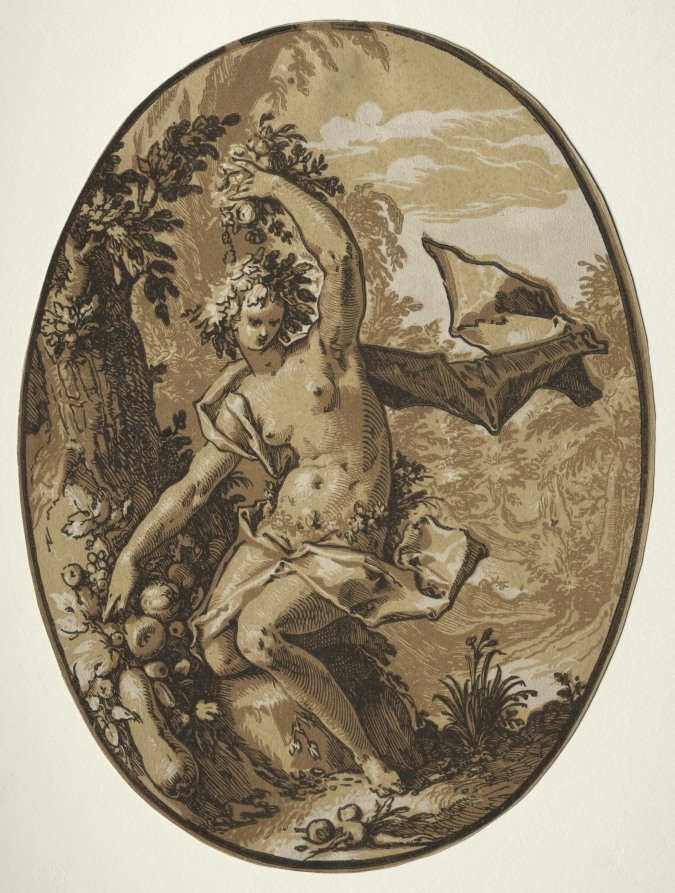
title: The Deities: Proserpine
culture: Netherlands, late 16th-early 17th century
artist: Hendrick Goltzius (Dutch, 1558–1617)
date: c. 1588–90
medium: chiaroscuro woodcut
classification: Print